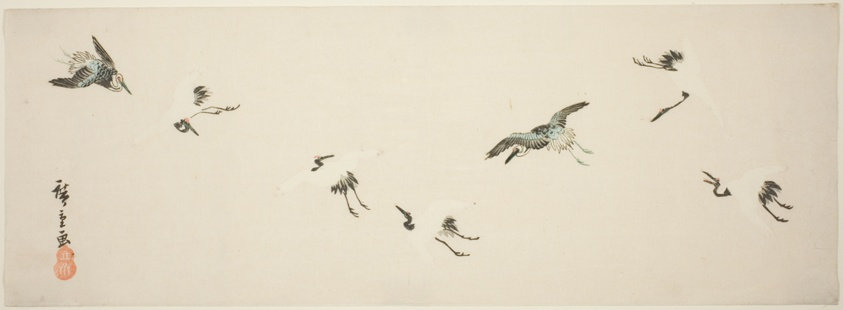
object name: Print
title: Cranes in flight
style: Japanese (culture or style)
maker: Utagawa Hiroshige 歌川 広重; Japanese, 1797-1858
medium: Color woodblock print; nagaban, surimono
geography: Japan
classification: woodblock print; print; asian art